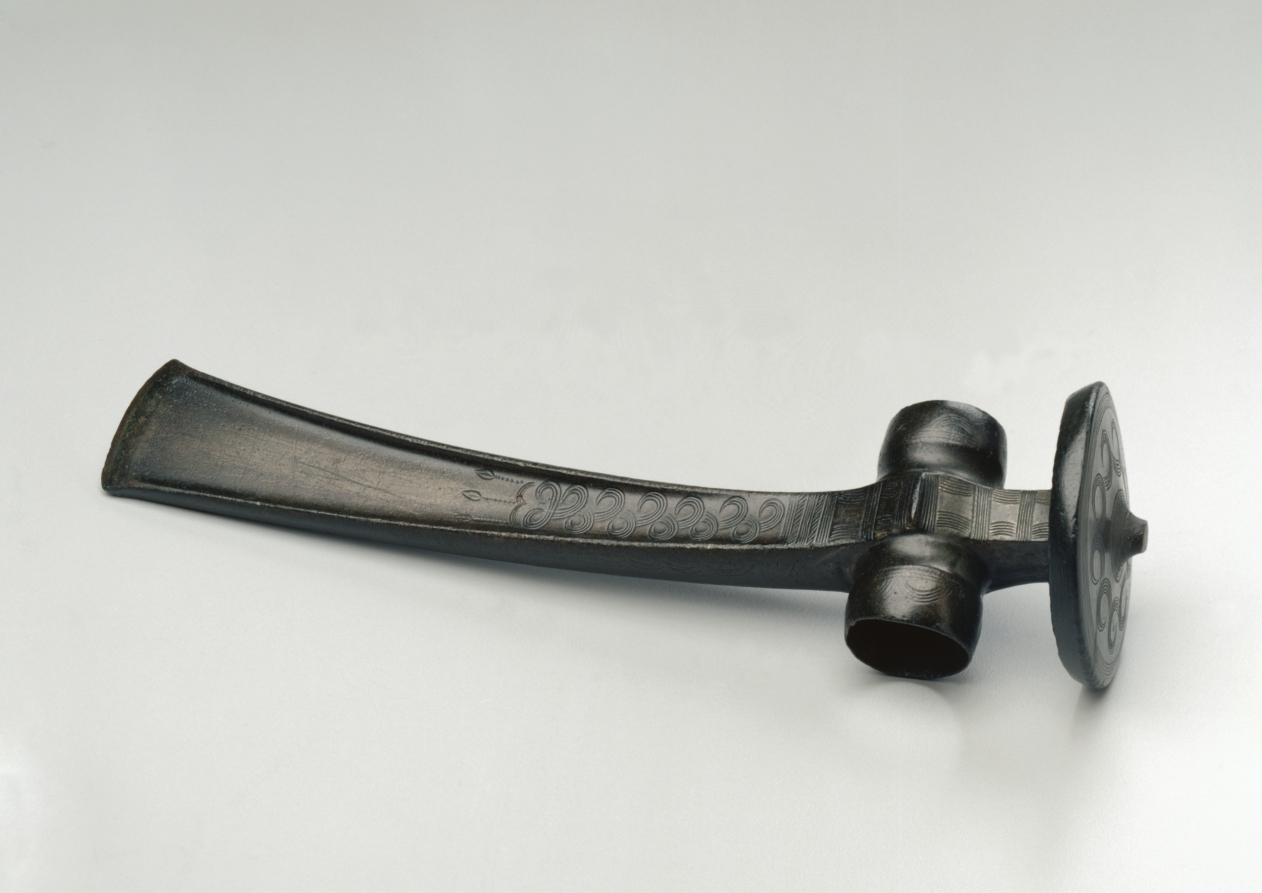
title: Battle Axe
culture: Hungary, Bronze Age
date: c. 1500 BCE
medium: bronze, solid-cast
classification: Metalwork